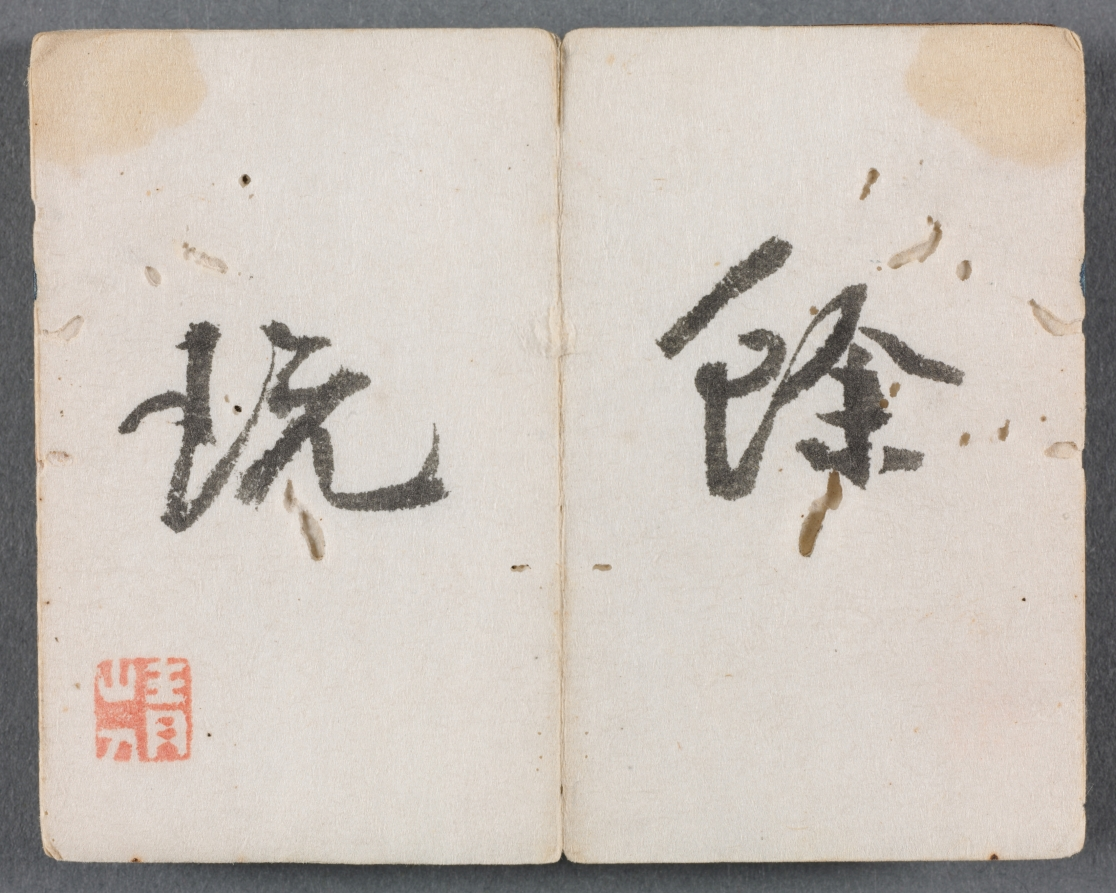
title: Miniature Album with Figures and Landscape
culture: China, Qing dynasty (1644–1911), Qianlong reign (1736–95)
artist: Zeng Yandong (Chinese, c. 1751–1827)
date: 1822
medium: Album of twelve leaves, ink and color on paper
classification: Painting